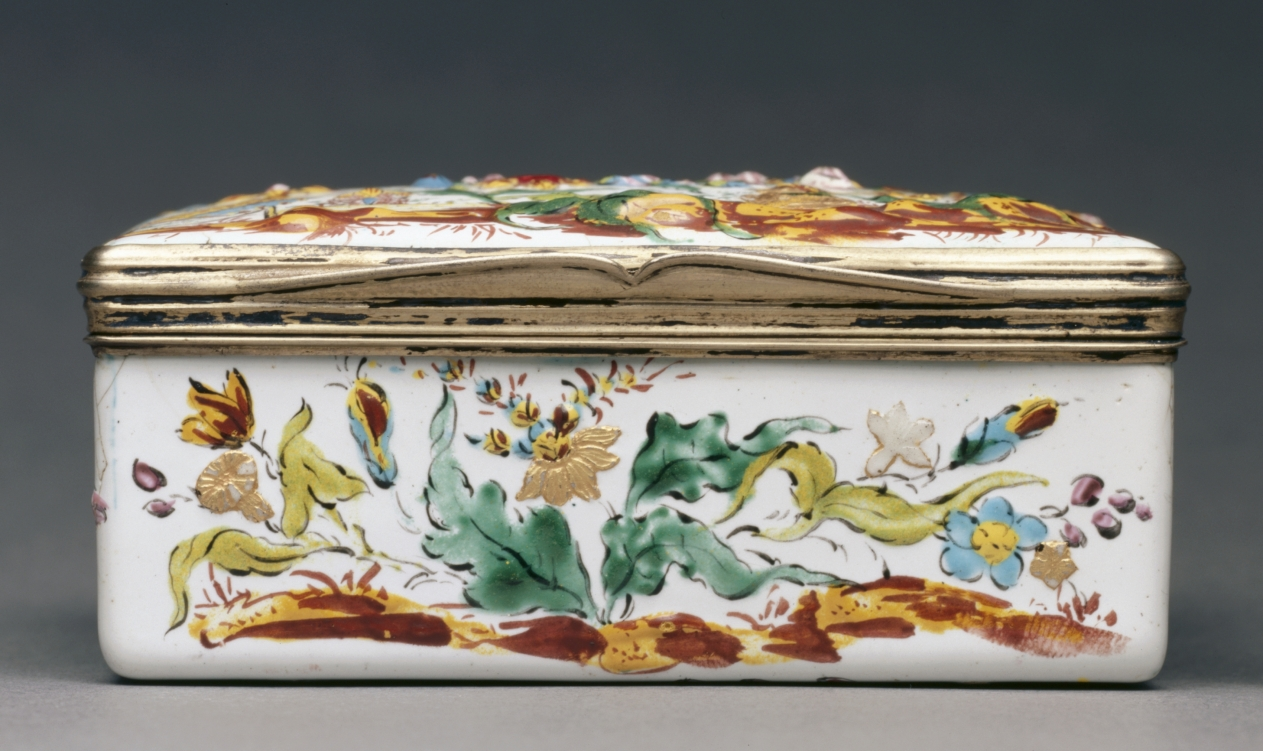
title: Box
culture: France, 18th century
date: 1749–50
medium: silver gilt and enamel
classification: Enamel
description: Chinoiserie in 18th-century France incorporated imitations of East Asian motifs, designs, and ornaments into European art. These imitations were often distorted by the European imagination and were not accurate representations of the cultures from which they drew inspiration. Elements of chinoiserie in this box can be seen primarily on the lid where enormous, vibrantly colored flowers tower over two crouching figures and a grouping of buildings.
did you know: The flower petals on the box lid are raised, an effect produced by drops of transparent enamel placed on the box’s surface that imitates polished gemstones or pearls.